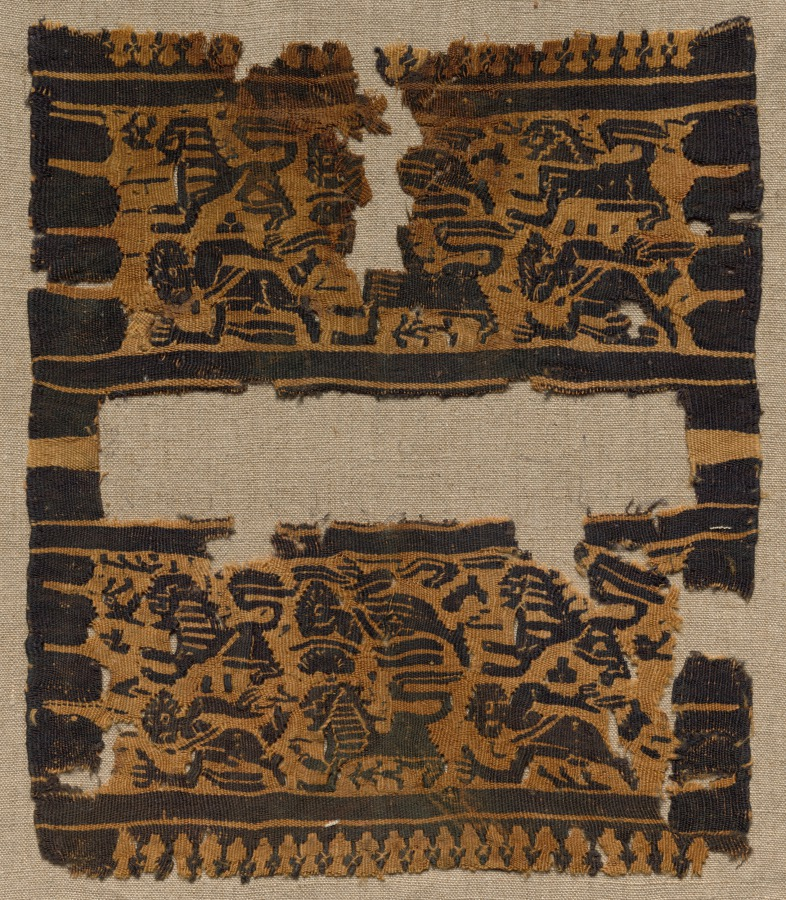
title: Fragment, Sleeve Ornament from a Tunic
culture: Egypt, Byzantine period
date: early 600s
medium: tapestry (originally inwoven in tabby ground); wool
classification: Textile